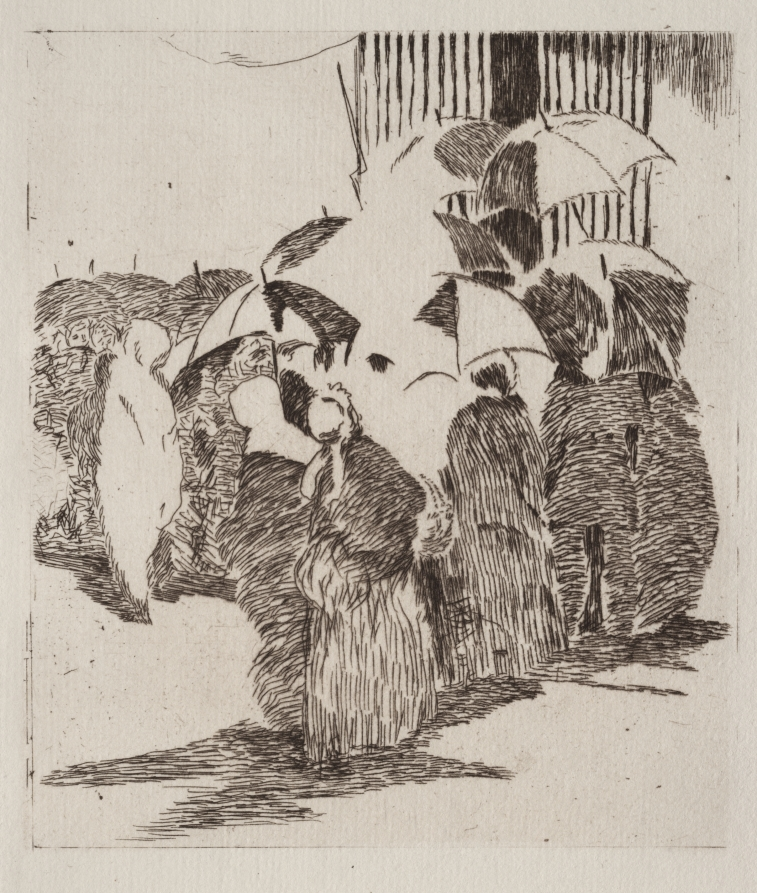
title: Line in Front of the Butcher Shop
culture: France, 19th century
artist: Édouard Manet (French, 1832–1883)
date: 1870–71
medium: etching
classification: Print